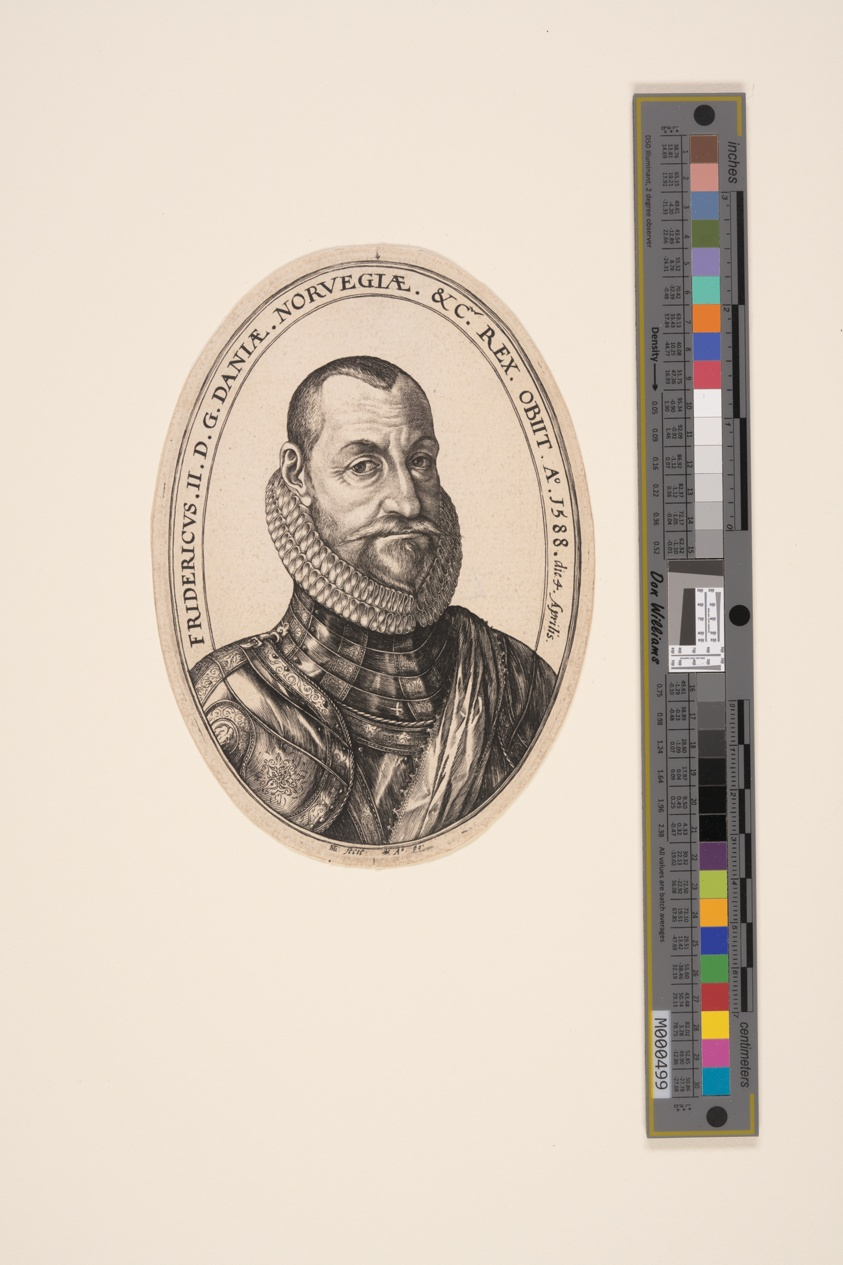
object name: Print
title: Frederick II, King of Denmark and Norway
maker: Hendrick Goltzius (Dutch, 1558–1617)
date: 1590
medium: Engraving on laid paper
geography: Netherlands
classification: engraving; paper; print; prints and drawing